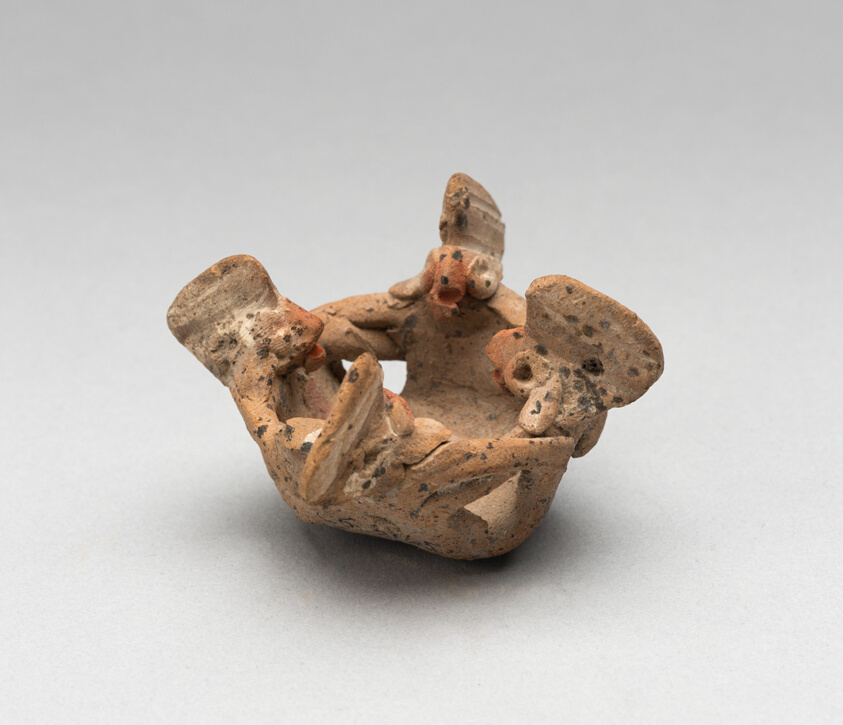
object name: Sculpture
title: Miniature Group of Four Figures in a Circle with Linked Arms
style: chupicuaro, Arts of the Americas, mesoamerican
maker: Chupícuaro (Guanajuato or Michoacán, Mexico)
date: 500–300 BCE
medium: Ceramic and pigment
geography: Chupícuaro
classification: earthenware; ceramics; sculpture; art of the americas